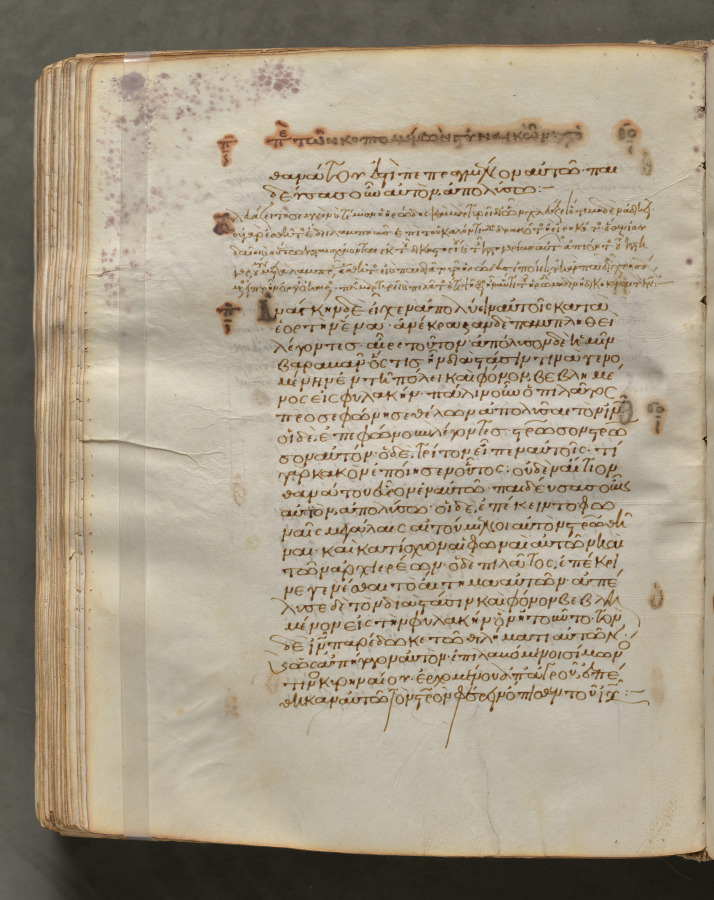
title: Text, folio 314 (verso), from a Gospel Book with Commentaries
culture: Byzantium, Constantinople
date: c. 1000–1100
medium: ink, tempera, and gold on vellum; leather binding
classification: Bound Volume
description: Each of the four gospels in this book opens on a page with brilliantly illuminated borders depicting the author of the text as well as birds—principally peacocks, symbols of the immortality of the soul—and fountains, representing the fountain of life and the salvation of the soul. This volume consists of 428 leaves with texts in Greek. Its level of sophistication suggests that it was probably written and decorated in a monastery in Constantinople.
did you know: Gospel books were carried in procession through Byzantine churches.